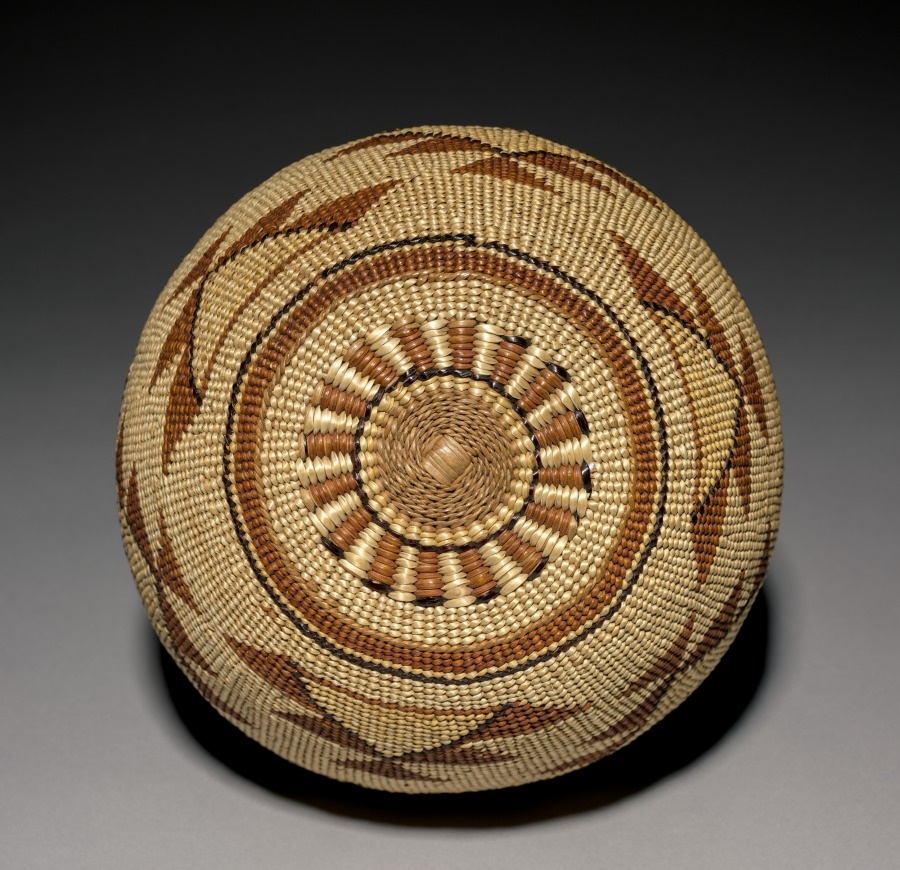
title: Hat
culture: California, late 19th- early 20th century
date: c 1875–1917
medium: plain-twined hazel with decoration in beargrass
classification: Basketry